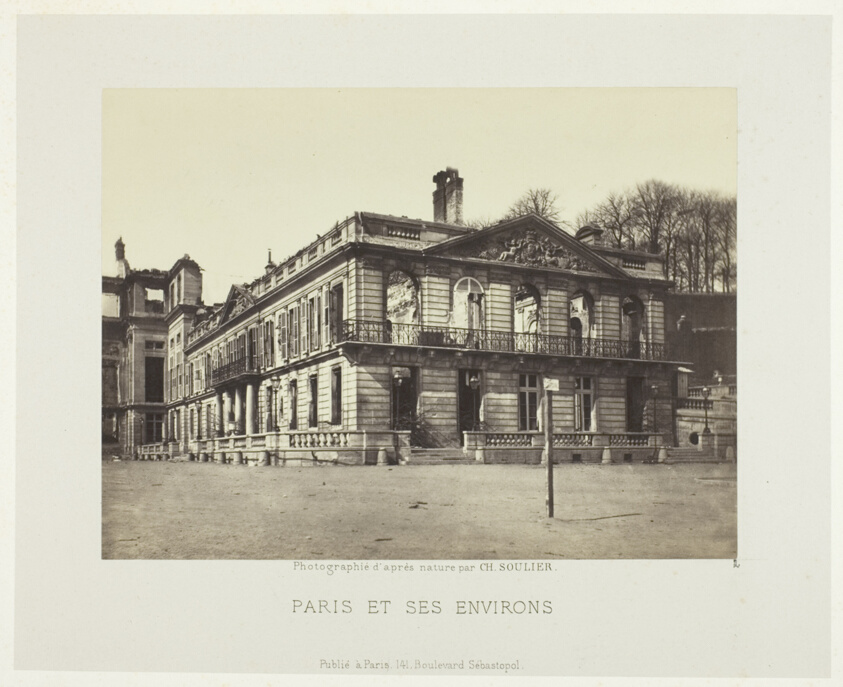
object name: Photograph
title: Palais de Saint-Cloud, from the series "Paris et ses environs"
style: 19th century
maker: Charles Soulier (French, 1840–1875)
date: 1870/71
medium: Albumen print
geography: France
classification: gelatin silver (developing-out-paper) pr; photographic process; photography; photograph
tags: Collected by Hugh Edwards, Paris